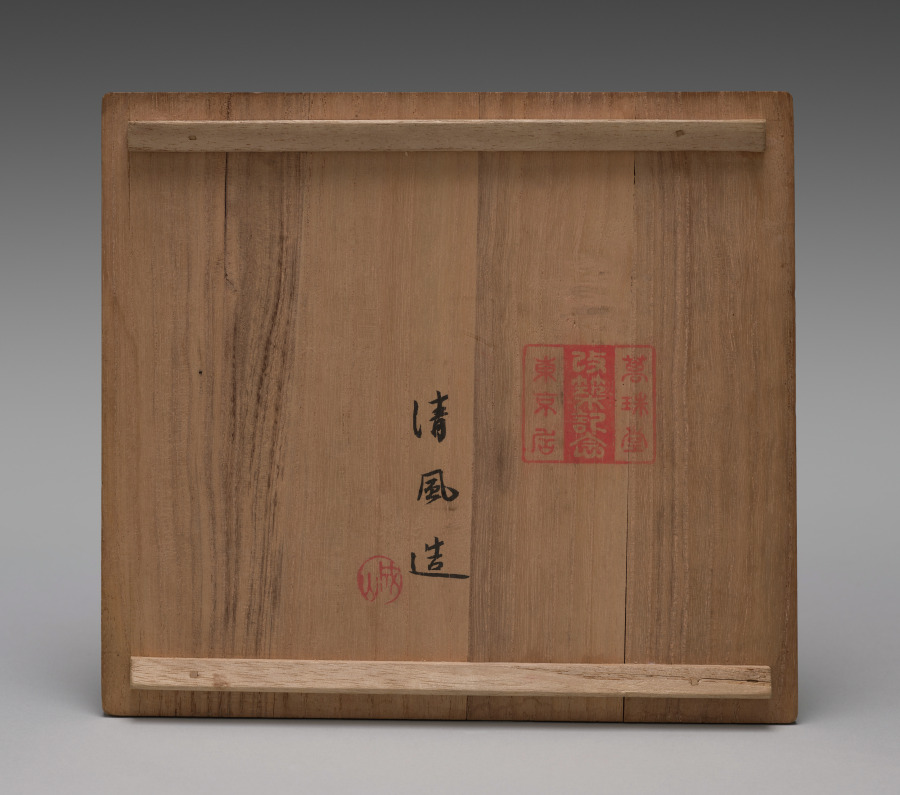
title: Bowl with Chrysanthemums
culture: Japan, Taishō period (1912–26) or Shōwa period (1926–89)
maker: Seifū Yohei IV (Japanese, 1872–1951)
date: 1914–46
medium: Stoneware with underglaze iron oxide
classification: Ceramic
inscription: 清風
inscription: 菊画/ 鉢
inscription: The inside of the box lid has a seal indicating that the bowl was included in a renewal opening of the gallery Manjudo in Tokyo.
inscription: 清風造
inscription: 成山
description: The chrysanthemums in underglaze iron oxide of this bowl of Kyoto ware have a casual feel, which is emphasized by the bowl's shape. When held, the its slightly ridged body would gently massage one’s palms, contributing to the sensory, tactile experience of the piece and possibly generating a sense of comfort and ease. The inside of the box lid has a seal indicating that the bowl was included in a renewal opening of the gallery Manjudo in Tokyo.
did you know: Stoneware works of this type are classified as Kyoto ware, after the city where the style developed.